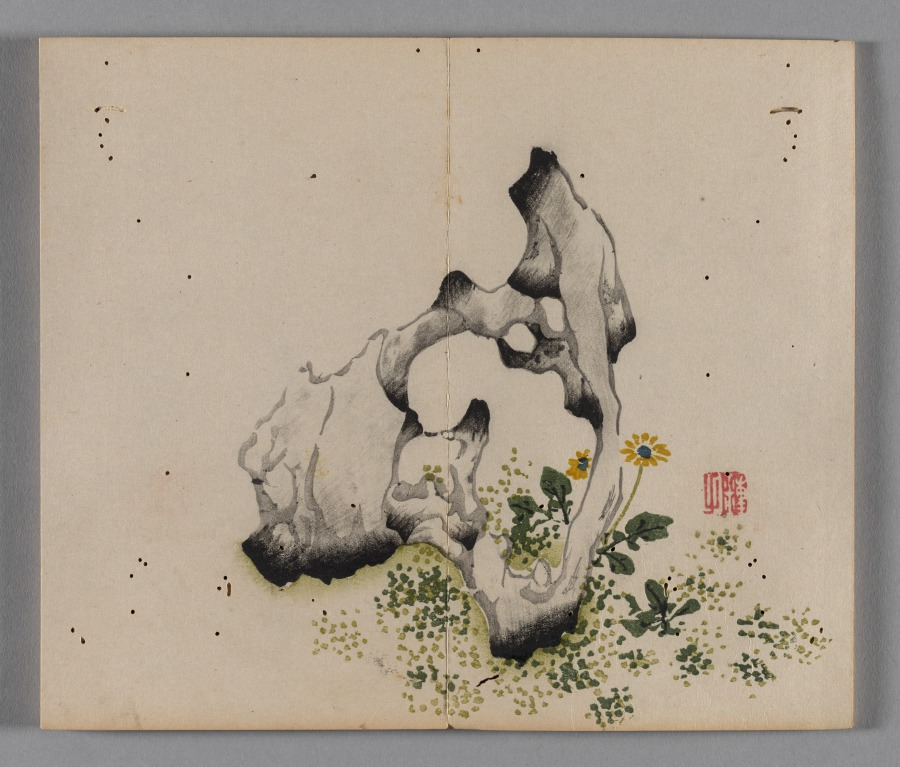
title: Ten Bamboo Studio Painting and Calligraphy Handbook (Shizhuzhai shuhua pu): Miscellaneous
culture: China, Qing dynasty (1644-1911)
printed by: Hu Zhengyan (Chinese, c. 1584–1674)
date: 1633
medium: Woodblock-printed book; ink and colors on paper; first edition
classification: Print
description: Color printing reached a level of perfection in the early 1600s, as seen in this Ten Bamboo Studio Collection of Calligraphy and Painting and the Mustard Seed Garden Manual of Painting (printed 1679 and 1701). The painterly quality, precision in registering (aligning) the woodblocks, and harmonious colors made them the most successful color print editions in Chinese history. Both editions were printed and compiled in Nanjing, spread nationwide, and had a great impact on the arts in Japan and Korea.